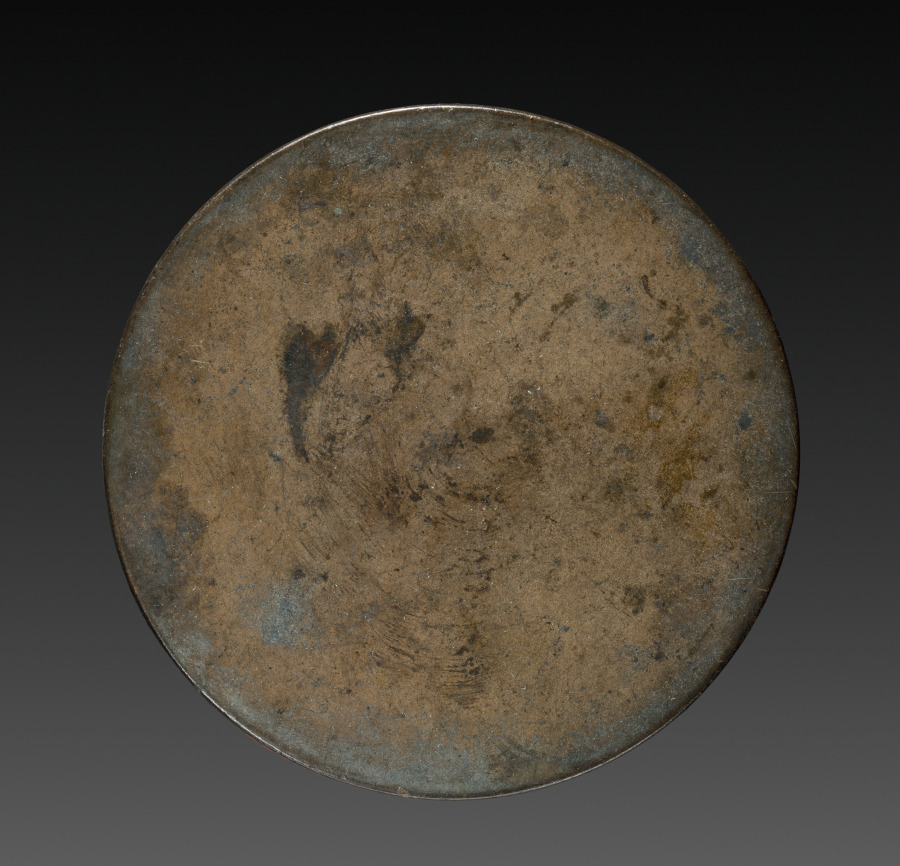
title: Mirror with Pair of Birds on Tortoiseshell Pattern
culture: Japan, Muromachi period (1392–1573)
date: 1392–1573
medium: bronze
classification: Metalwork